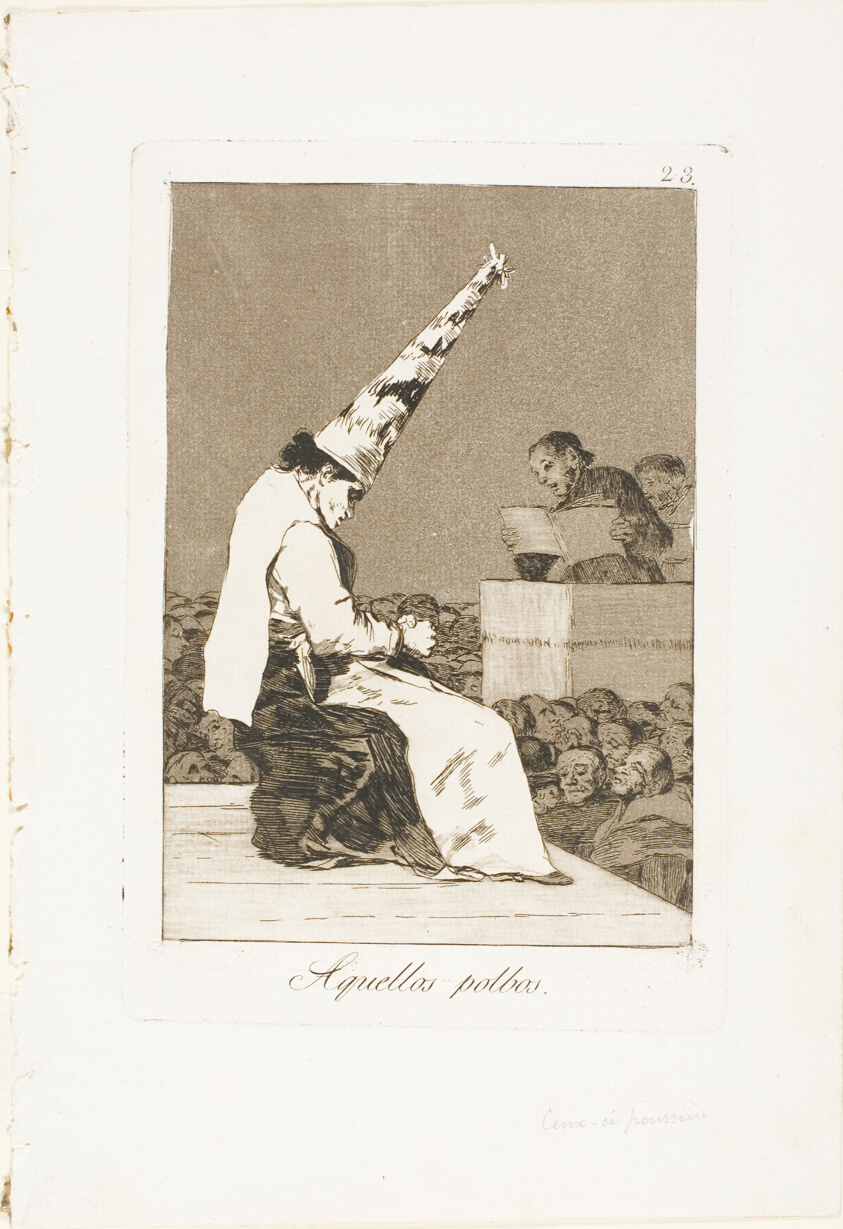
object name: Print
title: Those specks of dust, plate 23 from Los Caprichos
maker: Francisco José de Goya y Lucientes (Spanish, 1746-1828)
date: 1797/99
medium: Etching and aquatint on ivory laid paper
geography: Spain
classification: etching; print; prints and drawing